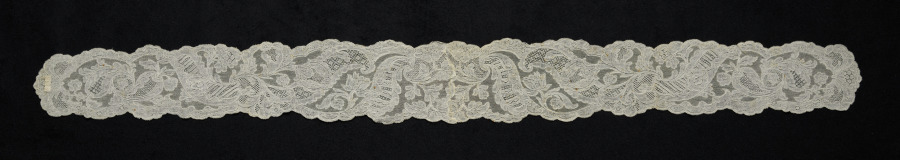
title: Lace Lappet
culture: Belgium, Mechelen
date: 1700s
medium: Linen: bobbin lace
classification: Lace